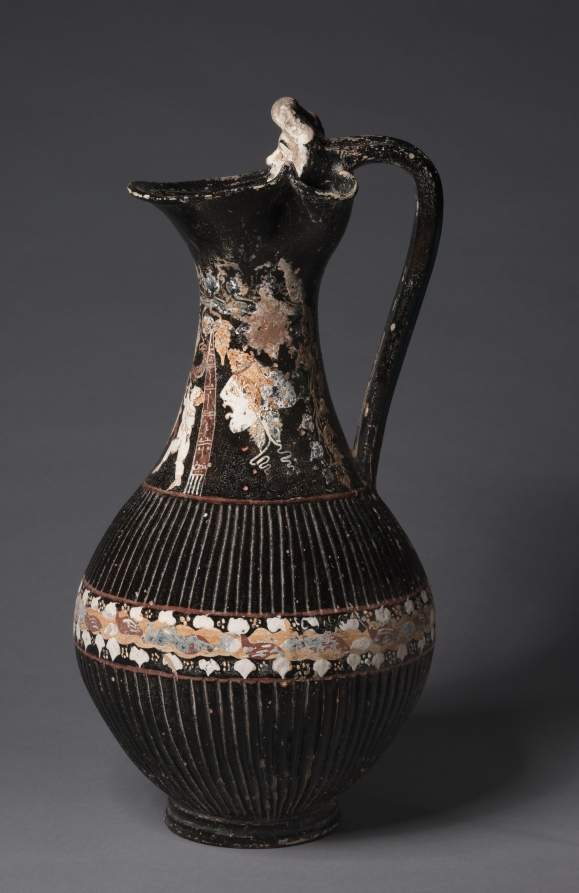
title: Gnathian Ribbed Oinochoe (Wine Jug): Masks, Dancer, and Flute-Player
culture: South Italian, Apulian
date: c. 300–275 BCE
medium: ceramic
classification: Ceramic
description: The ornate decoration of this grand vessel takes several forms. A mold-made male theater mask sits at the upper handle attachment, looking out over the rim. Below this, two chubby boys—a dancer and pipe-player—cavort on the neck, flanked by female masks. Farther down, a band of ivy leaves and berries on a red and yellow ribbon adorns the widest point of the vessel, with ribbing above and below.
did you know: The ribbed lower body of this large jug likely emulates vessels made of precious metal.